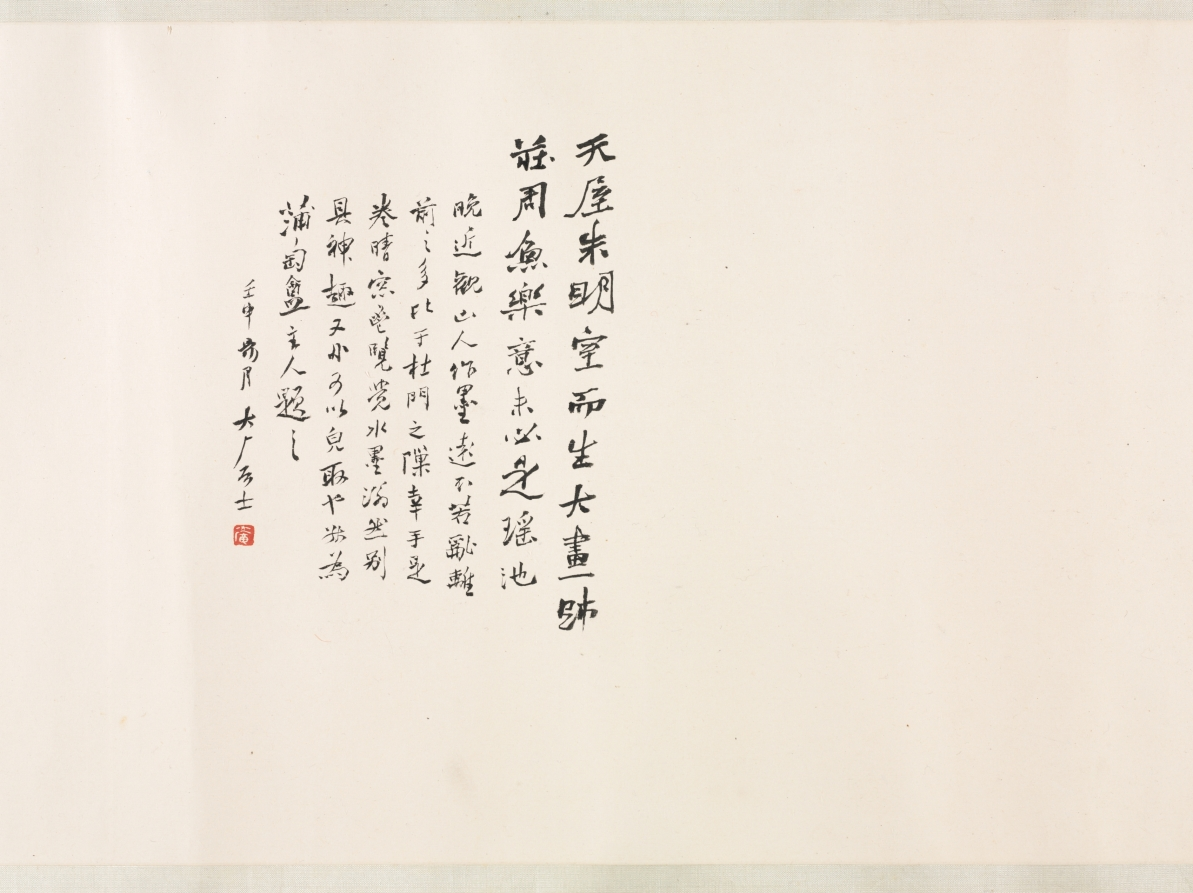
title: Fish and Rocks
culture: China, Qing dynasty (1644-1911)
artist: Bada Shanren (Chinese, 1626–1705)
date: mid- to late 1600s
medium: Handscroll; ink on paper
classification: Painting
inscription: 去天纔尺五，只見白雲行。 云何畫黃花，雲中是金城。 [印] 个山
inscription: 雙井舊中河，明月時延佇。 黃家雙鯉魚，為龍在何處。 [印] 个山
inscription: 三萬六千頃，畢竟有魚行。 到此一黃頰，海潮次上笙。 [印] 个山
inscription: 5 additional seals: 2 of Zhang Daqian 張大千 (1899–1983); 1 of Ta-an Chü-shih; 2 unidentified.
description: Bada Shanren, also called Zhu Da, a 17th-century painter who rejected conventions in favor of an individual, personal expression, is known for his unorthodox compositions of fish, flowers, birds, and rocks. Fish in his paintings are often looking upward toward heaven, swimming in a pond of undefined space. As a member of the Ming imperial family, Zhu Da lost his princely status and hid in a monastery when the Manchus, foreigners from the north, established the Qing dynasty in 1644. This scroll may have some autobiographical meaning, representing fish as leftover subjects (yimin) who lived in a void, having lost their roles in life after the fall of the dynasty.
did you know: After each poem, Bada Shanren used his so-called jixingyin seal 屐形印, which resembles the impression of a shoe on soft mud.